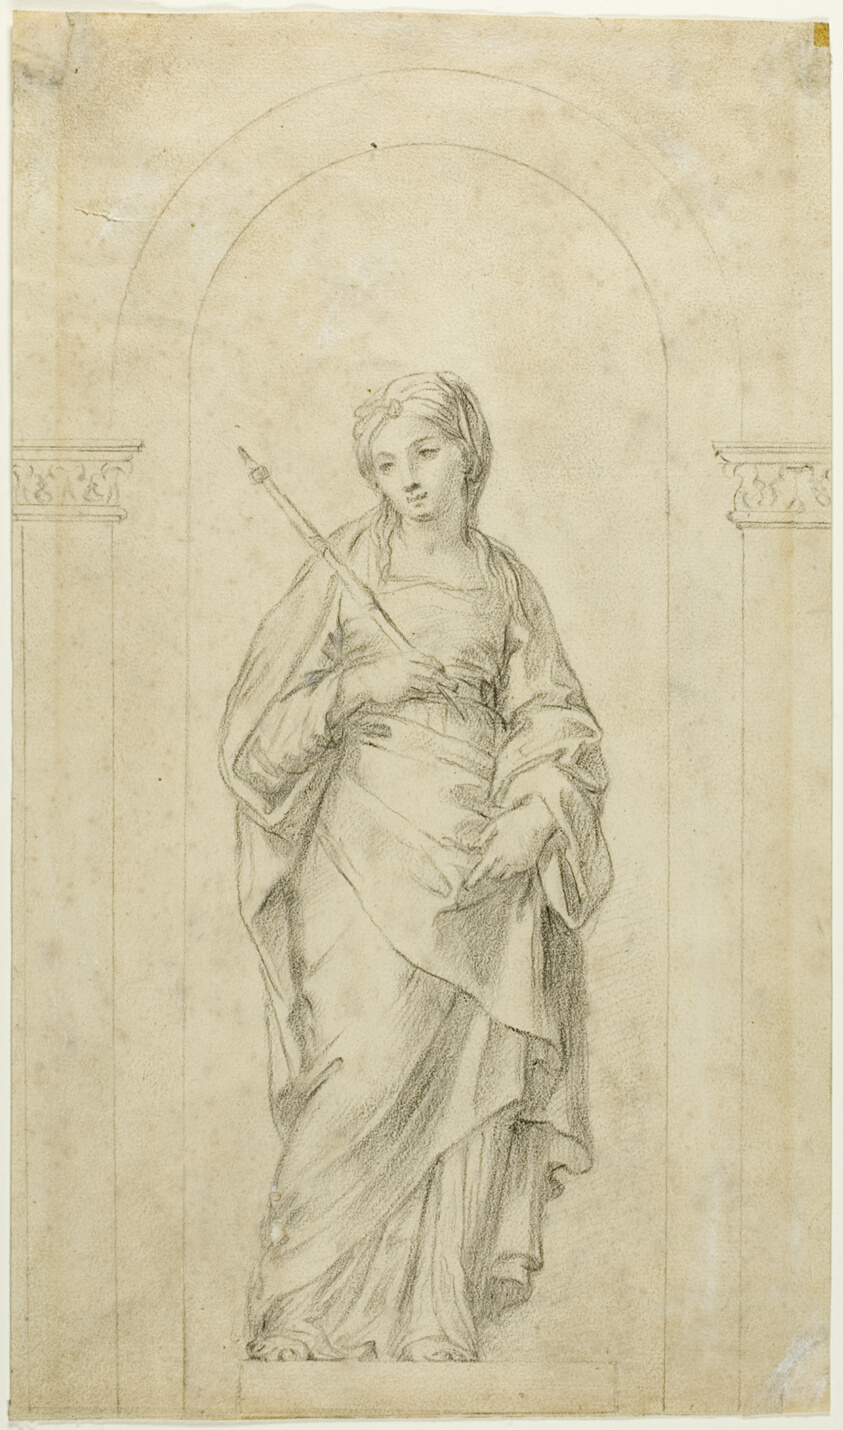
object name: Drawing and Watercolor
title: Saint Standing in a Niche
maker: Follower of Carolo Maratti; Italian, 1625-1713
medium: Charcoal on ivory laid paper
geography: Italy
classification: charcoal; drawings (visual works); prints and drawing